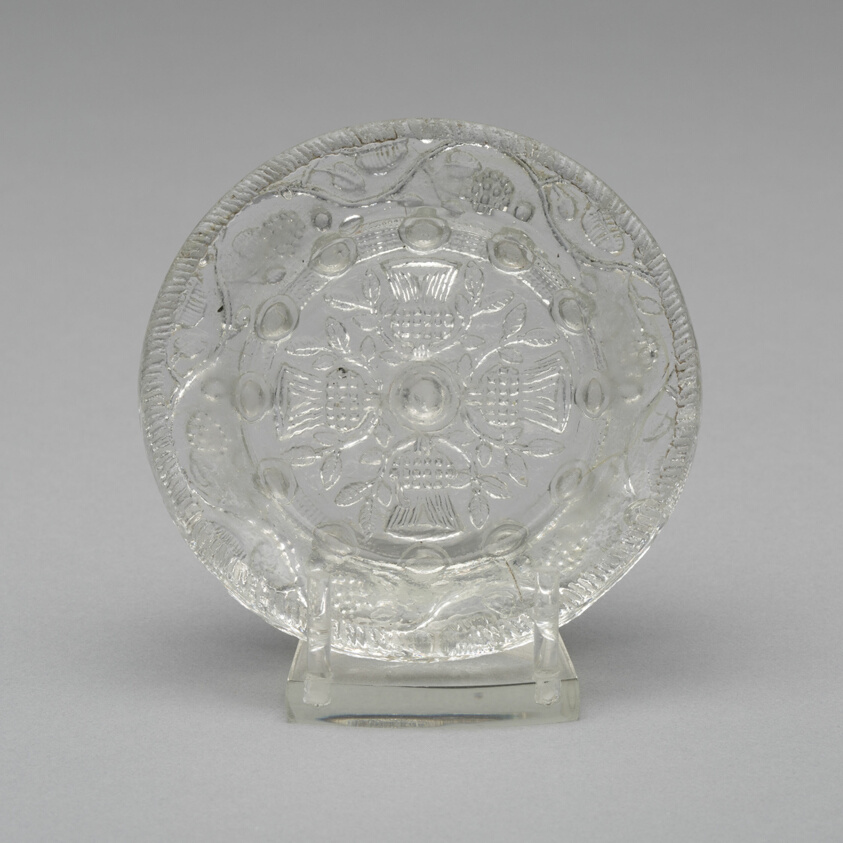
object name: Glass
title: Cup plate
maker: Artist unknown (American, 19th century); Midwest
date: 1830–35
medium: Pressed glass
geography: Midwest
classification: plate (general, dish); glass; american decorative arts; american arts; decorative arts